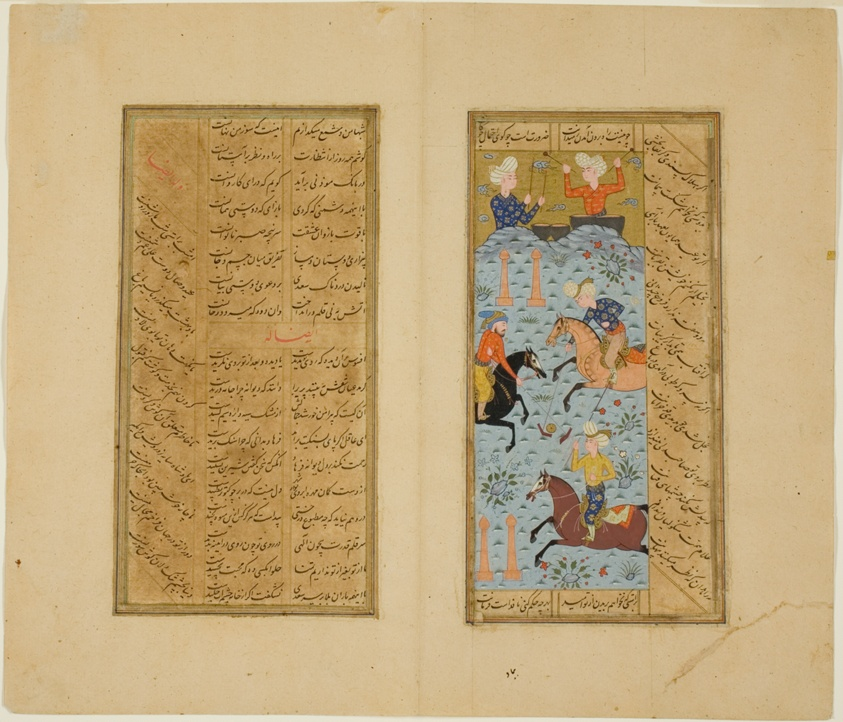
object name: Drawing and Watercolor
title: A Polo Game: Page from a Kulliyyat (Collected Works) of Sa'di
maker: Iran; Shiraz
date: Safavid dynasty (1501–1722), 16th century, c. 1585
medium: Ink, opaque watercolor, and gold on paper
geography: Shiraz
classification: miniature painting; painting; asian art